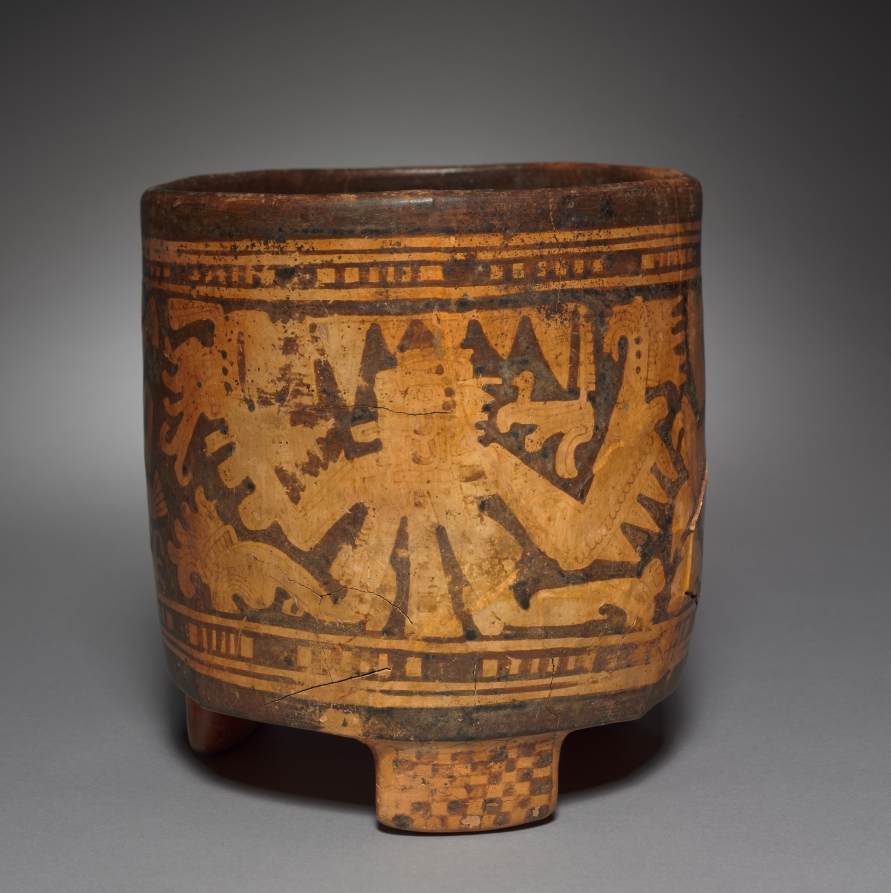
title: Vase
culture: Honduras, Maya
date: 250–900 CE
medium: earthenware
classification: Ceramic